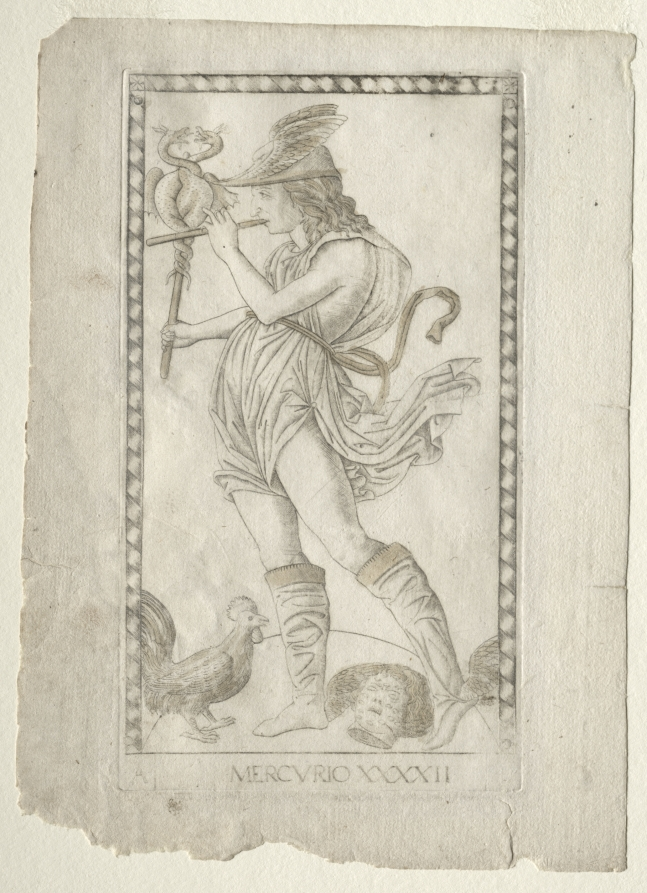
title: Mercury (from the Tarocchi, series A: Firmaments of the Universe, #42)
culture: Italy, Ferrara, 15th century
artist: Master of the E-Series Tarocchi (Italian, active 1460s)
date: before 1467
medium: engraving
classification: Print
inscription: Lettered below the image of Mercurio (Mercury): A / ·MERCURIO XXXXII· / [42]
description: This engraving is part of the Tarocchi group marked with the letter “A”, and named Firmaments of the Universe. This series comprises the seven planets from the classical astronomy (Moon, Mercury, Venus, Sun, Mars, Jupiter, Saturn) and the three celestial spheres that separate them from the Supreme Entity (Prima Causa) from which everything was originated. Here, Mercurio (Mercury) is personified as a full-length male figure, in profile to the left, while blowing a flute. Mercury appears as Hermes, the Greek messenger of gods. In his right hand holds up a caduceus, a herald staff at the top of which are two intertwined winged snakes. He also wears a petasos and a pair of talaria, respectively winged hat and shoes. At his feet is a cock—animal sacred to him—and the decapitated full-eyed head of Argo. Mercury was believed to be both the son of Saturn and the brother of Jupiter, and the second in the order of planets.